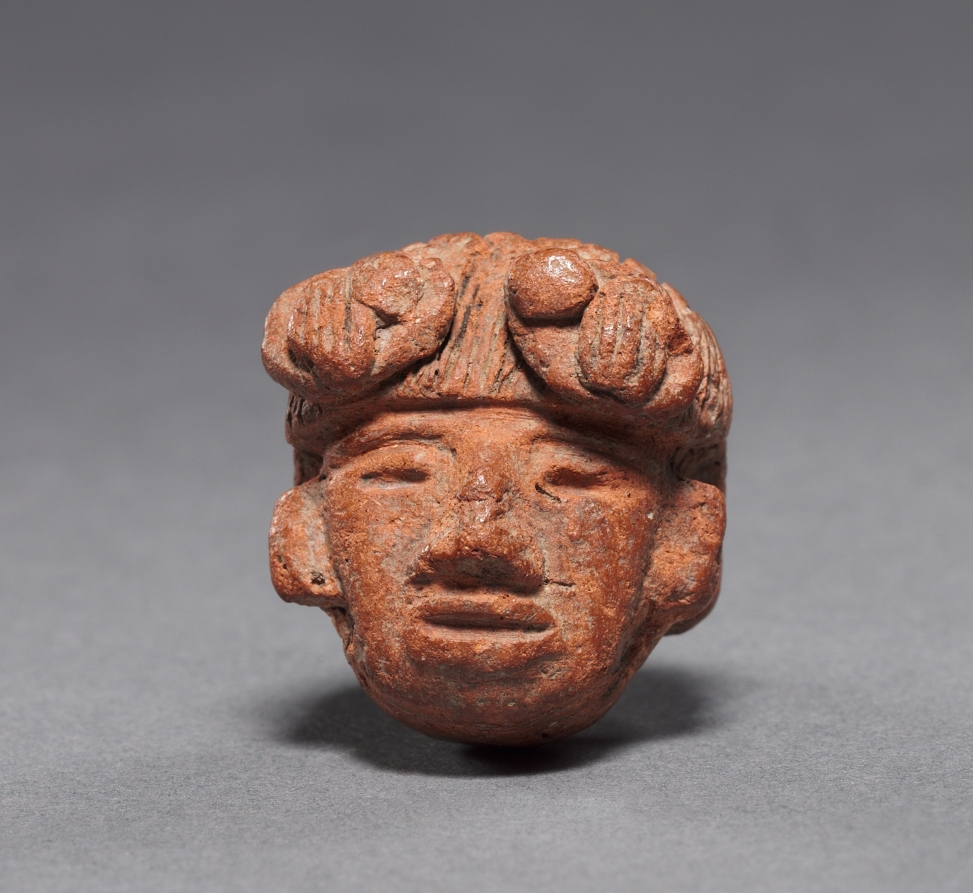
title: Head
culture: Mesoamerica, Pre-Columbian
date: before 1519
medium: clay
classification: Sculpture